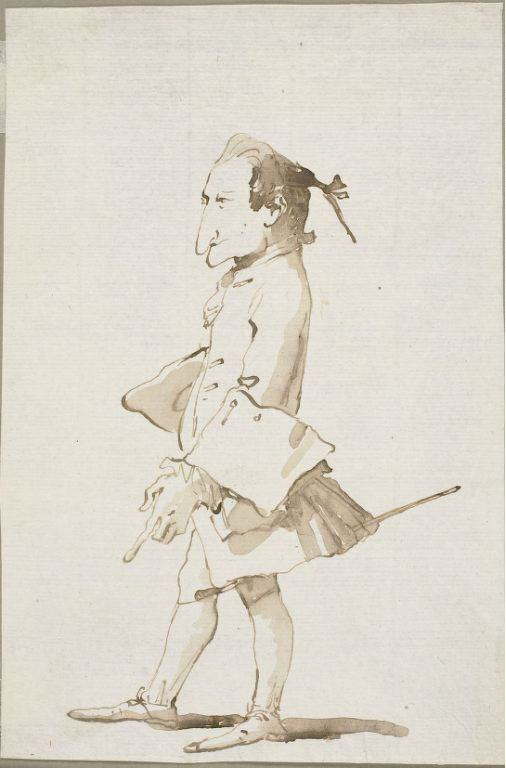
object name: Drawing and Watercolor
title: Caricature of a Man, Full-Length, Facing Left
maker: Giovanni Battista Tiepolo (Italian, 1696–1770)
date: 1754/62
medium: Pen and brown ink, brush and brown wash, on ivory laid paper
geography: Italy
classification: pen and ink drawings; drawings (visual works); prints and drawing